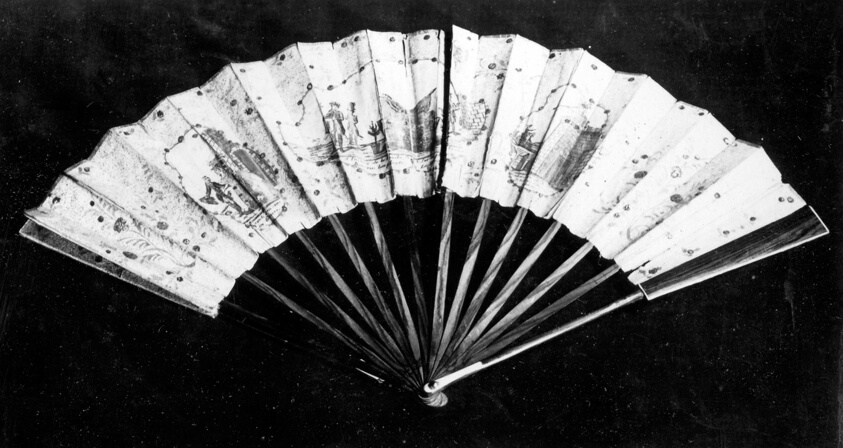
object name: Costume and Accessories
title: Fan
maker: France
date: c. 1780/90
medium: Plain wood sticks and guards; bordered with ivory paper mount, printed; metal rivet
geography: France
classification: textile; fan - paper; costume accessory - folding fan; costume